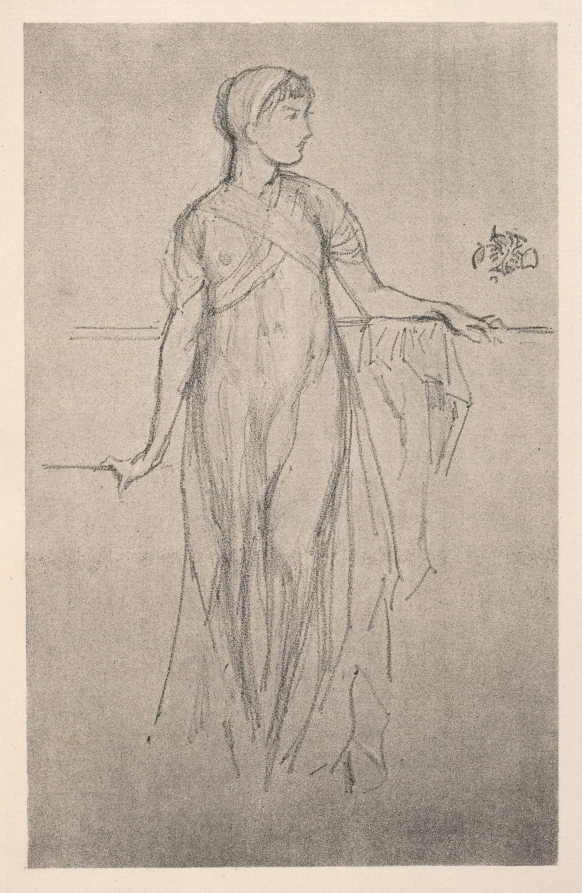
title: Study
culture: America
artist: James McNeill Whistler (American, 1834–1903)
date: 1879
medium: lithograph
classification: Print